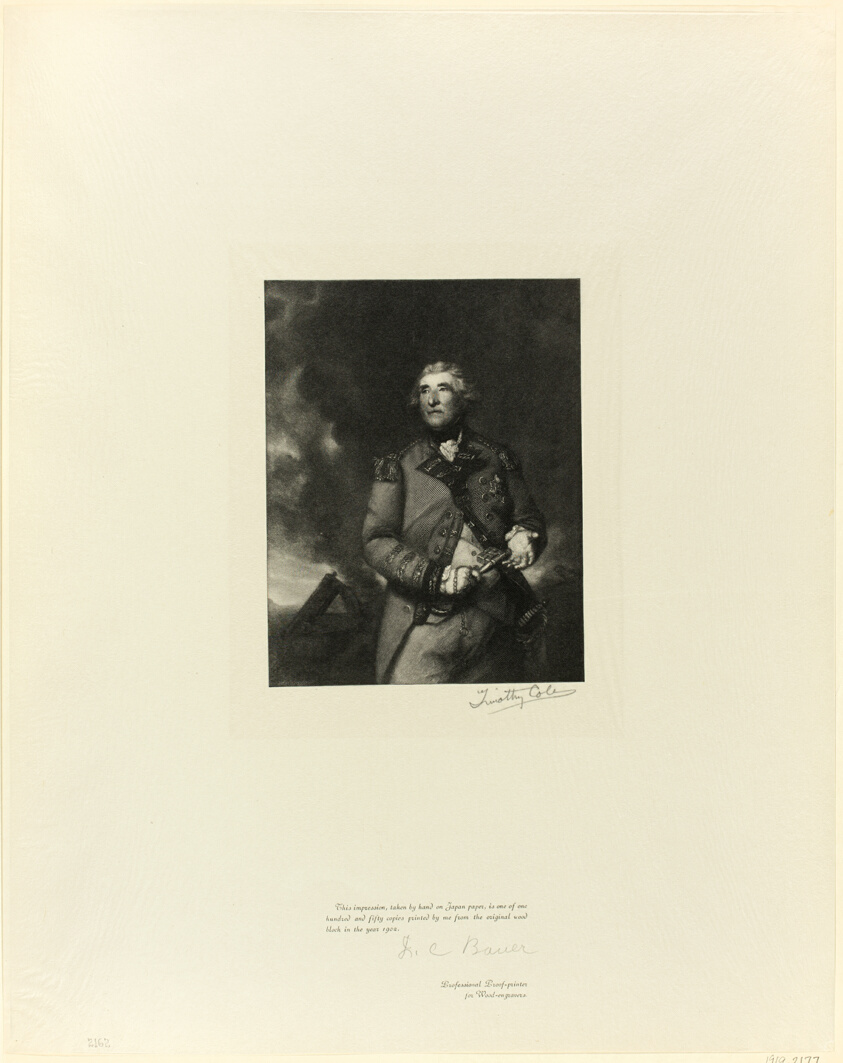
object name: Print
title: Portrait of Lord Heathfield, from Old English Masters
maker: Timothy Cole (American, born England, 1852-1931); after Sir Joshua Reynolds (English, 1723-1792)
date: 1897, printed 1902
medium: Wood engraving on chine paper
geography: United States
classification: wood engraving; print; prints and drawing